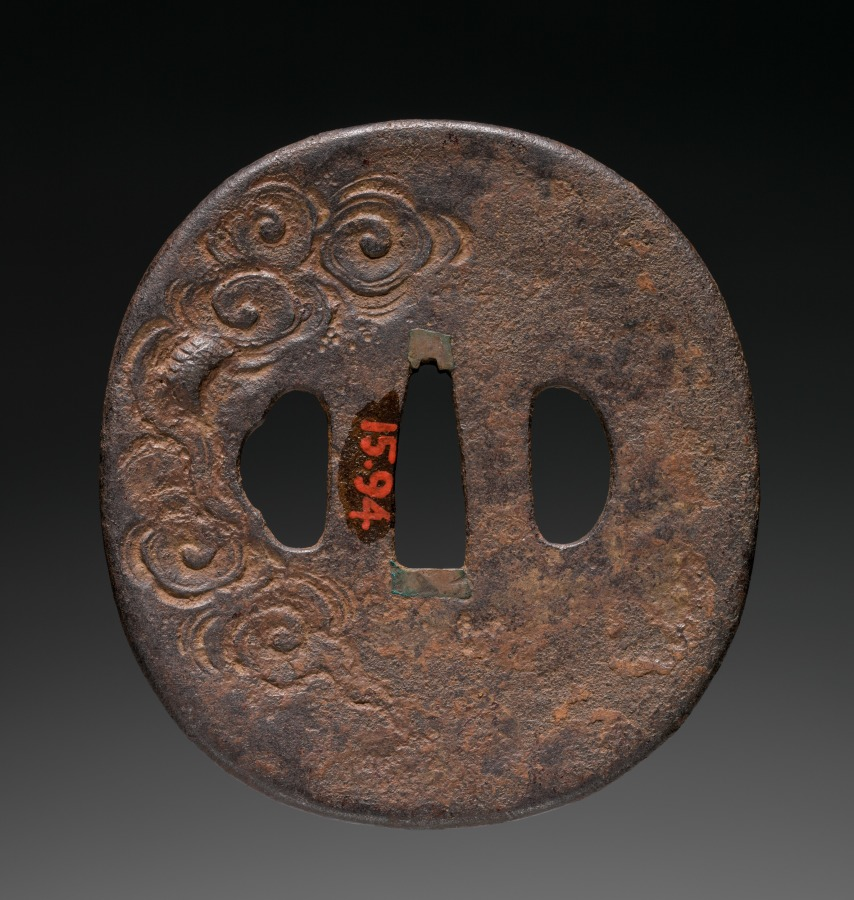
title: Sword Guard (Tsuba) with Dragon in Cloud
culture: Japan, possibly Edo period (1615-1868)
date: c. 1615–1868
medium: iron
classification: Arms and Armor